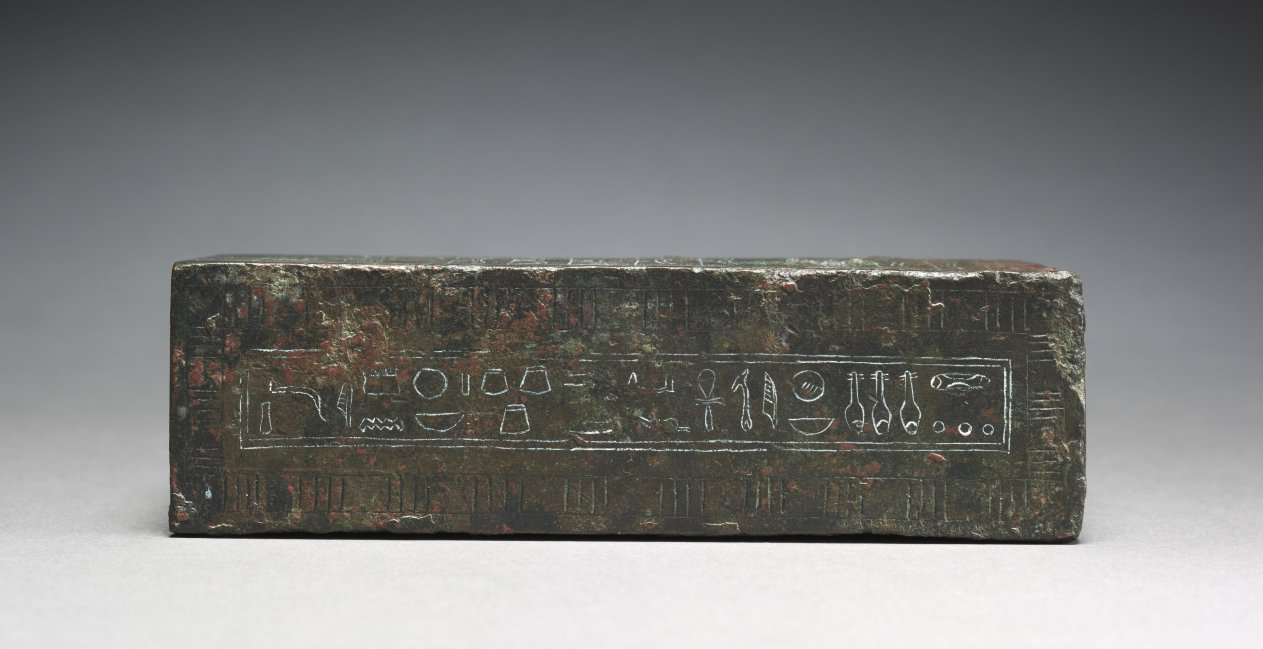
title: Statue Base Dedicated to Amen-Ra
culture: Egypt, Late period (715–332 BCE), Dynasty 26 or later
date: 664–525 BCE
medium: bronze, hollow cast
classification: Sculpture